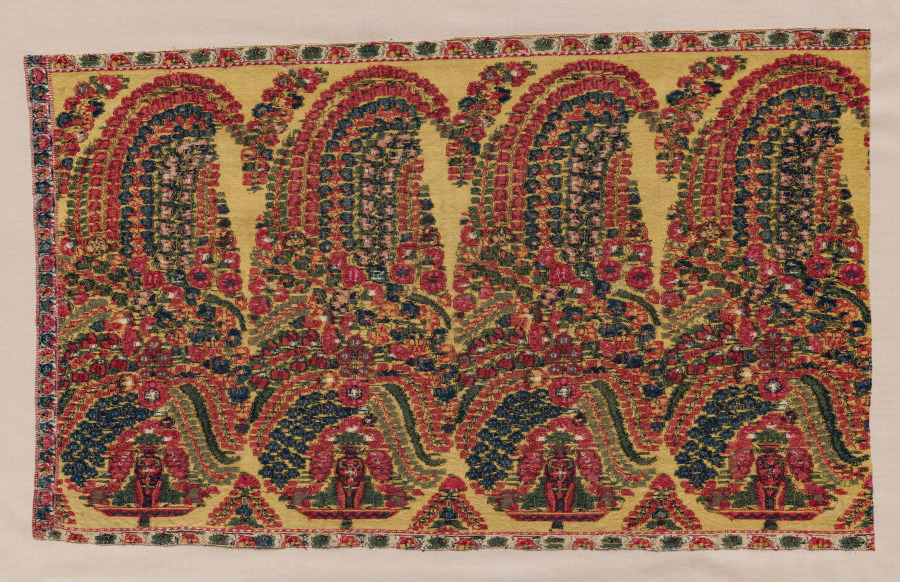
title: Border Fragment of a Shawl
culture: Kashmir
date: early 1800s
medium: wool: tapestry twill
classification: Textile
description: Green, yellow, red, blue, and white woolen threads were woven to create the instantly recognizable Kashmiri teardrop flower patterns on this shawl border. Such a work was part of a larger textile, which would have entranced the viewer with its complexity and vibrancy, especially as it moved with the wearer and contrasted with other articles of clothing.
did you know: The right edge of this textile features a repeating row of wild mulberries and flowers.